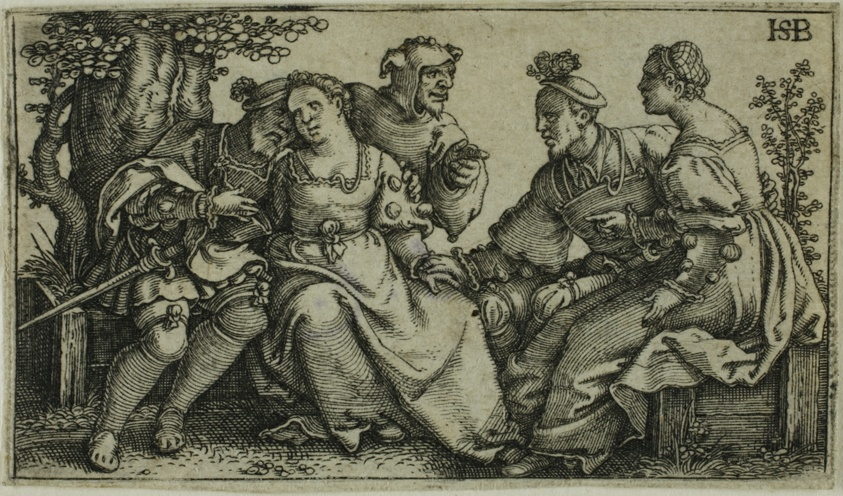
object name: Print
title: Two Couples and the Buffoon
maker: Sebald Beham; German, 1500-1550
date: 1535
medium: Engraving in black on ivory laid paper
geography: Germany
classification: engraving; print; prints and drawing